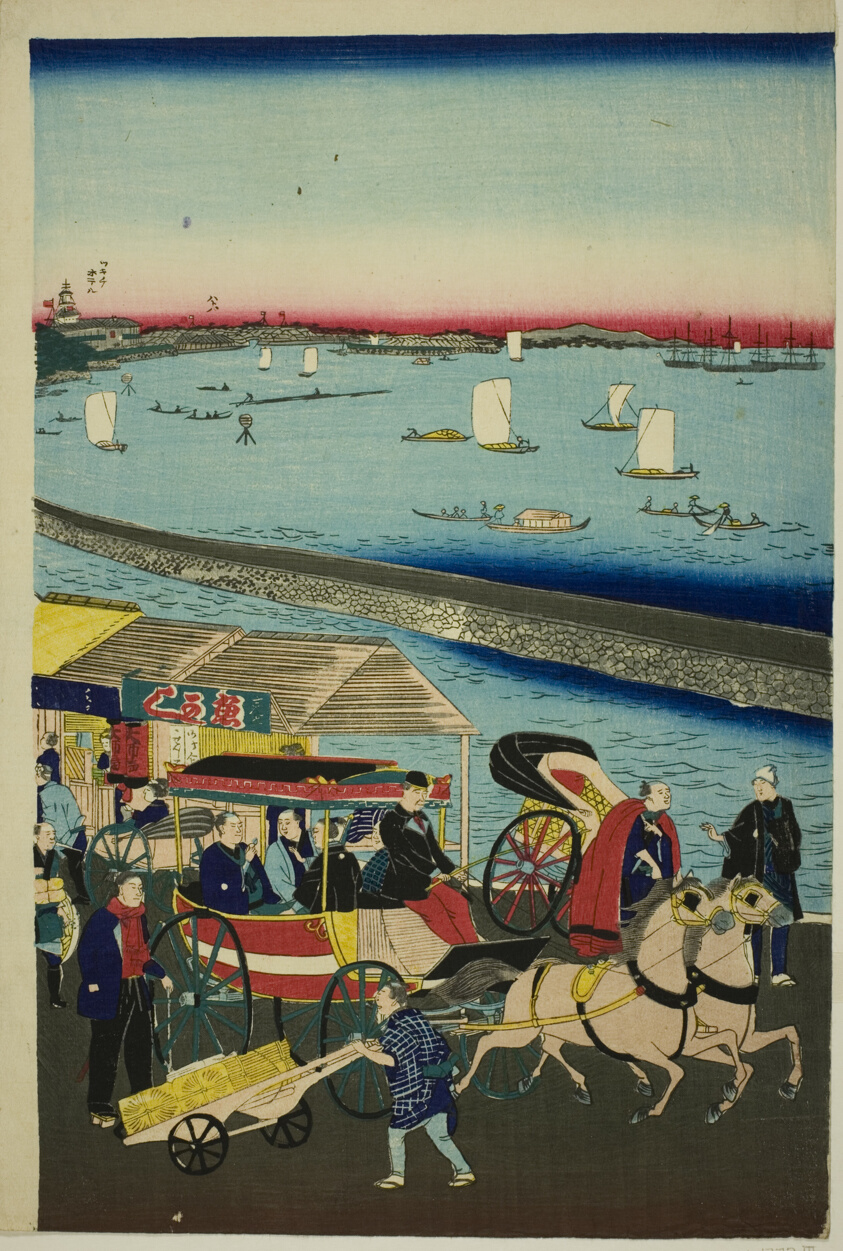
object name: Print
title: Picture of the Steam Engine Railway in Yatsuyama, Tokyo (Tokyo Yatsuyama shita kaigan jokisha tetsudo no zu)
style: Japanese (culture or style)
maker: Utagawa Hiroshige III (Japanese, 1842-1894)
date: c. 1871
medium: Color woodblock print; oban triptych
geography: Japan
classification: woodblock print; print; asian art